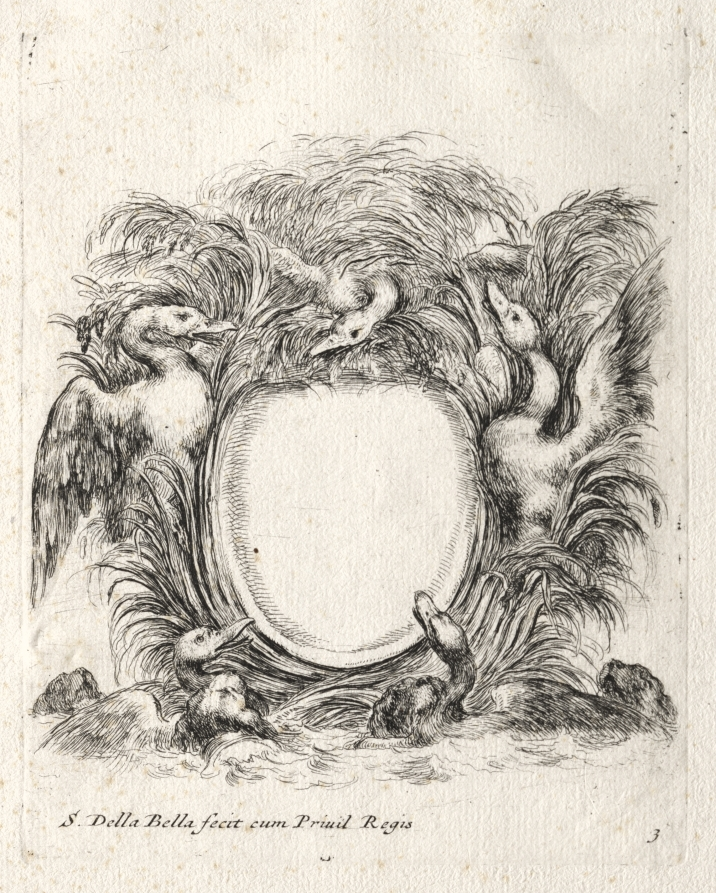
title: New Model for a Cartouche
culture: Italy, 17th century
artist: Stefano Della Bella (Italian, 1610–1664)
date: 1647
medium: etching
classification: Print